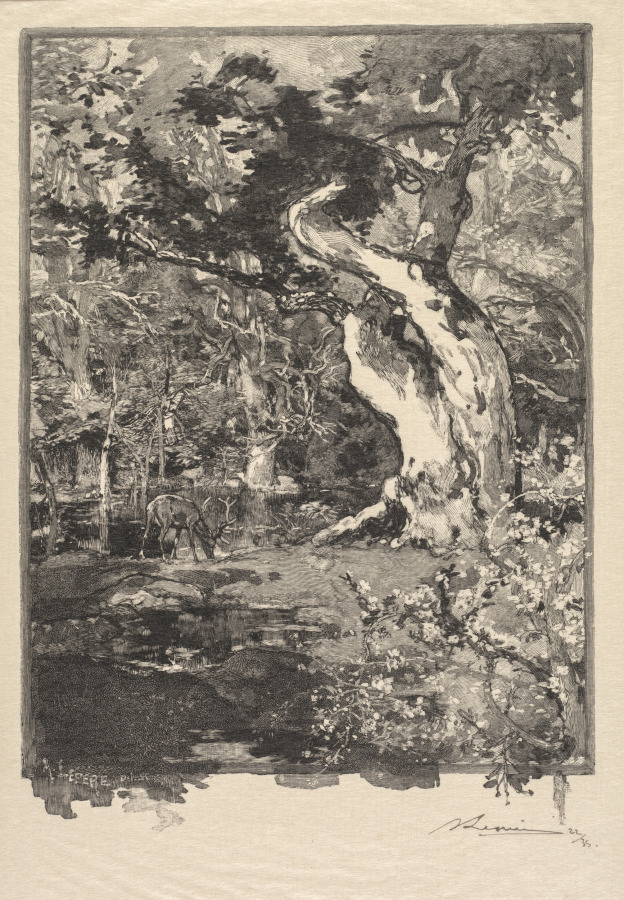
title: Fontainebleau Forest: Le Clovis, Plateau de Bellecroix (La Forêt de Fontainebleau: Plateau de Belle-Çroix, le Clovis)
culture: France, 19th century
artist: Auguste Louis Lepère (French, 1849–1918)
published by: A. Desmoulins, Published in Revue Illustrée, 1887–90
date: 1890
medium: wood engraving from bound volume of 34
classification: Bound Volume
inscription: In block, lower left: A. LEPÈRE. Del. sc; below image, lower right, in black ink: ALepère 22/35; on window mat, lower right, in graphite: Le Clovis